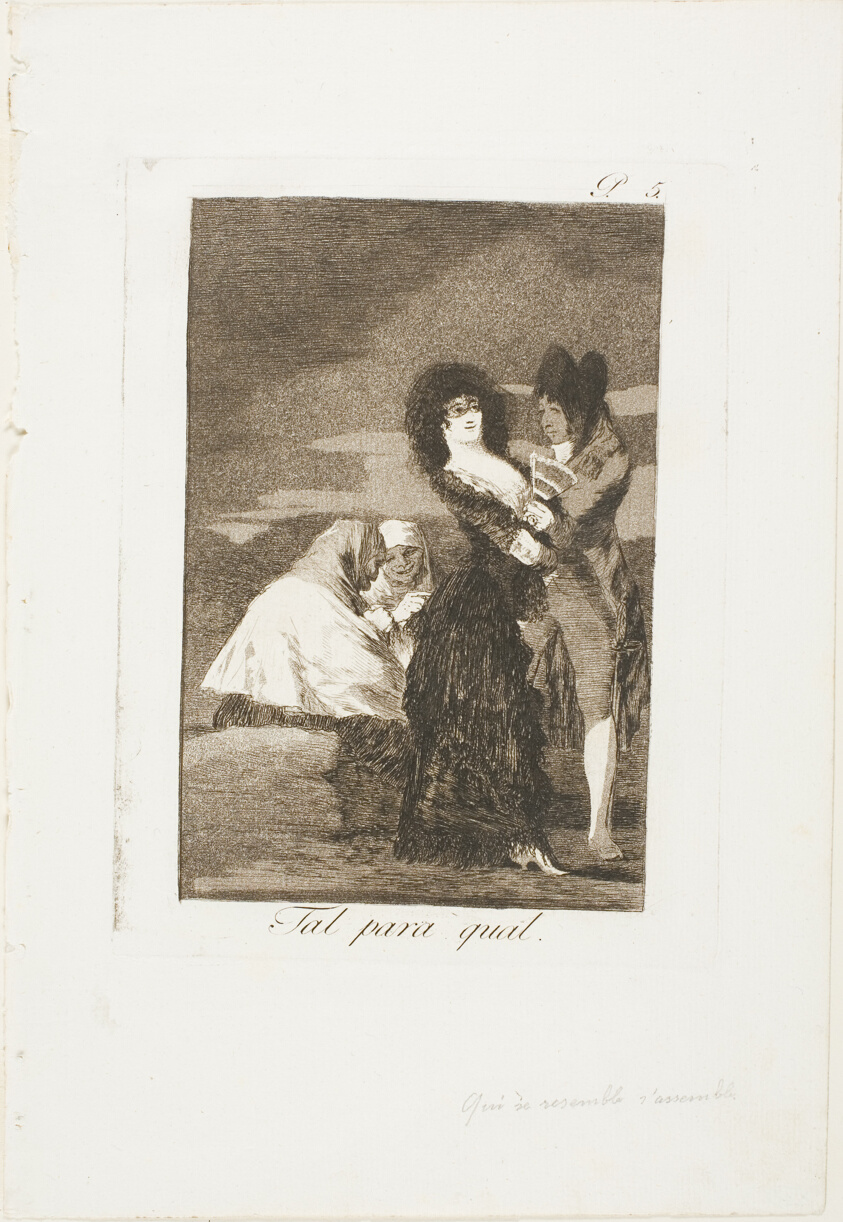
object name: Print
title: Two of a Kind, plate five from Los Caprichos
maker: Francisco José de Goya y Lucientes (Spanish, 1746-1828)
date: 1797/99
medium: Etching and aquatint on ivory laid paper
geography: Spain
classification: etching; print; prints and drawing